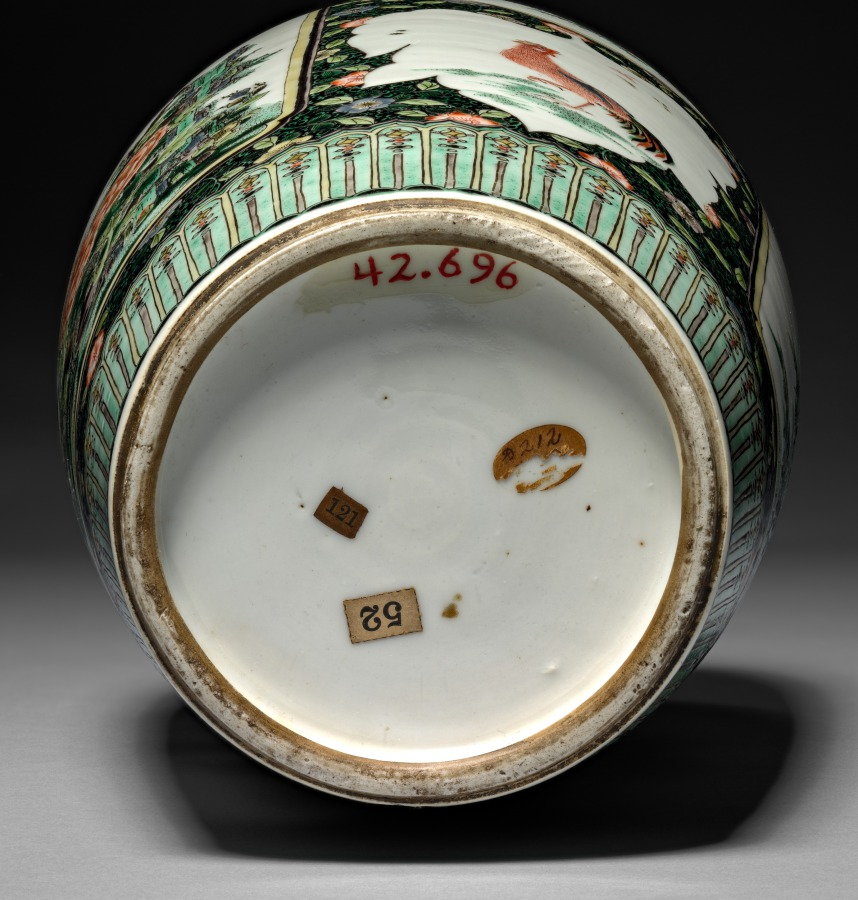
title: Baluster Vase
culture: China, Qing dynasty (1644-1911), Kangxi reign (1661-1722)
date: 1662–1722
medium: porcelain with famille verte overglaze enamel decoration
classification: Ceramic